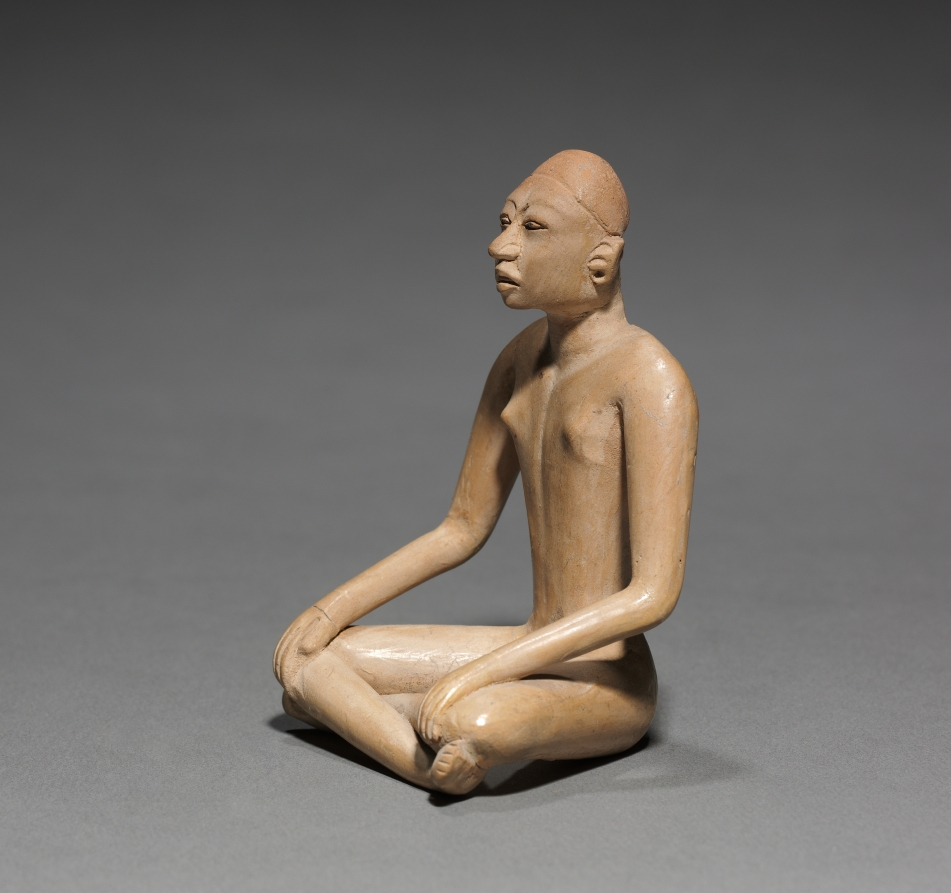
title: Seated Figurine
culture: Mexico, Gulf Coast, Huastec, Pánuco style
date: 1–700 CE (thermoluminescence date, 225–1055 CE)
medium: earthenware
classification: Sculpture